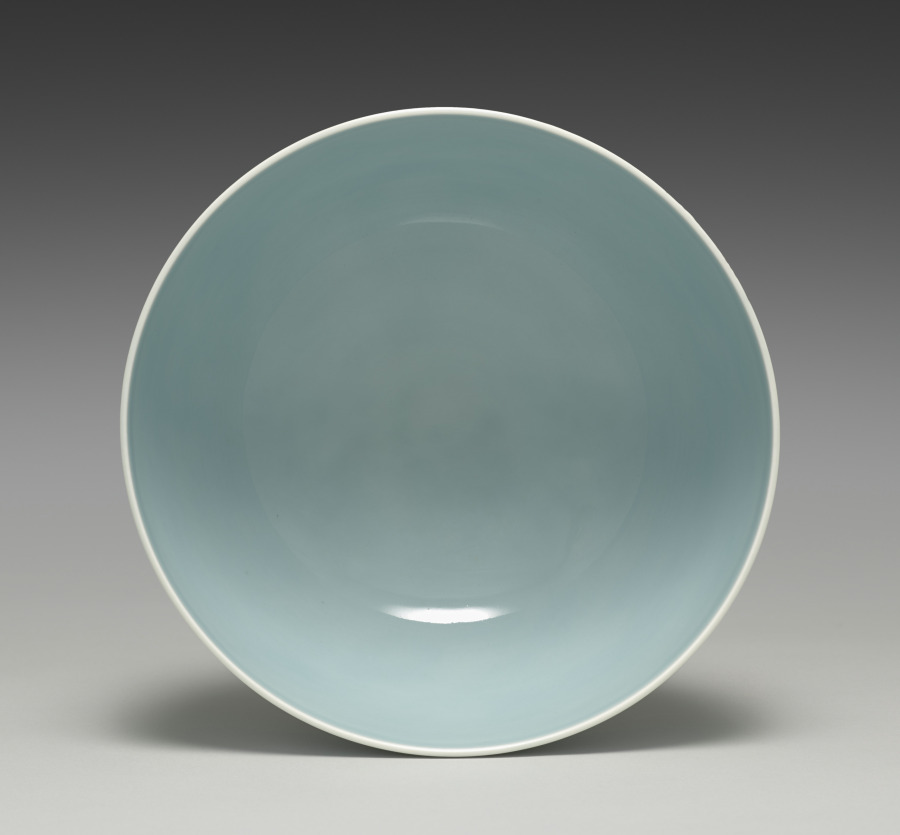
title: Sweets Bowl with Plum Tree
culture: Japan, Taishō period (1912–26) to Shōwa period (1926–89)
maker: Seifū Yohei IV (Japanese, 1872–1951)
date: 1914–46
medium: Porcelain with underglaze color and modeled design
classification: Ceramic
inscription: 清風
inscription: 清風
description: In Chinese culture, the plum symbolizes the virtue of perseverance. For his sweets bowl based on Qing dynasty (1644–1911) Chinese prototypes, Seifū Yohei IV first painted the gnarled boughs of a plum tree in iron oxide on the surface. Then he made the tree’s blossoms slightly raised by building up slip, or liquified clay. He painted their centers yellow. Before applying the blue glaze, he covered the blossoms with paper so that they remained white.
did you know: Broad access to high-quality Chinese ceramics occasioned by the collapse of the Qing dynasty (1644–1911) and the dispersal of elite Chinese collections presented Seifū Yohei IV with models for both molded decoration and painted motifs.